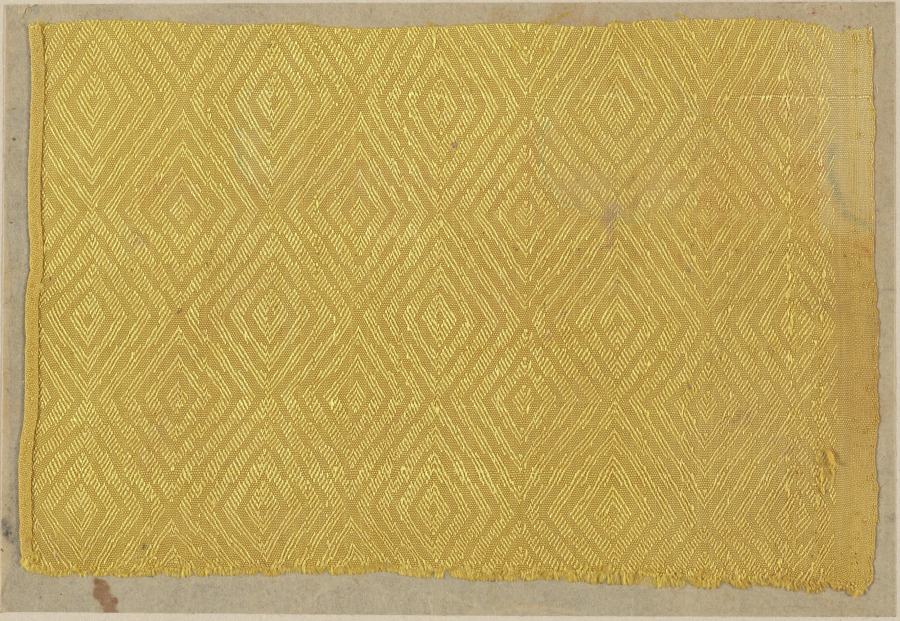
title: Fragment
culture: China, 8th century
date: 700s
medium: patterned tabby weave; silk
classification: Textile